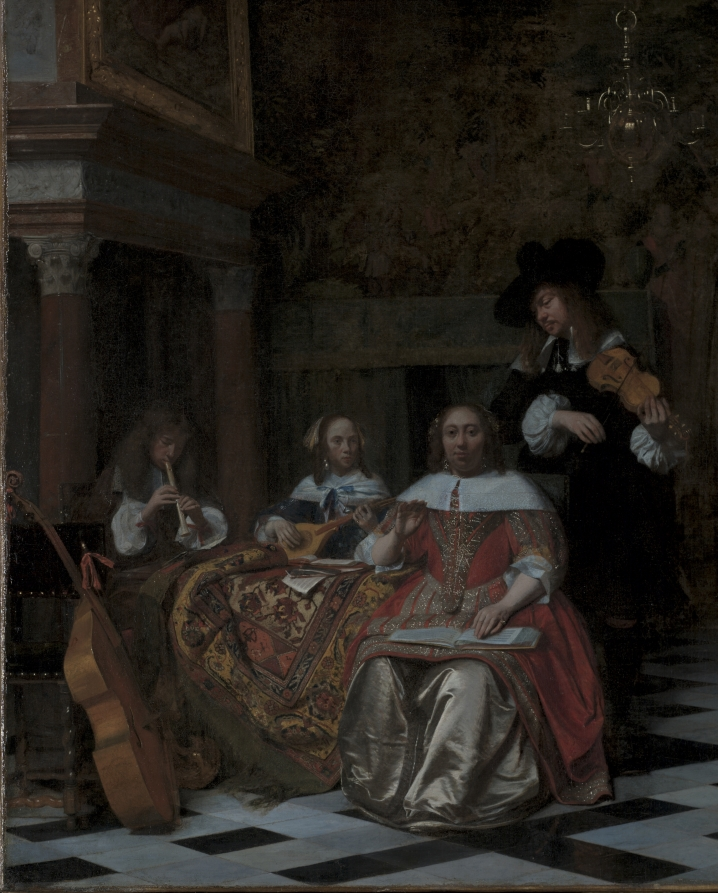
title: Portrait of a Family Playing Music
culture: Netherlands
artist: Pieter de Hooch (Dutch, 1629–1684)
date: 1663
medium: oil on canvas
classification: Painting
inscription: Signed lower left: "P D HOOCH/ 63"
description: The identity of the sitters remains unknown, although the marble floor and mantelpiece, the Transylvanian prayer rug on the table, and the silk clothes all point to the family’s considerable wealth. Furthermore, the richly carved chest at the right supports Chinese vases and Japanese lacquered boxes, a reference to the flourishing Dutch trade with Asia. Music making often took place at home, and its appearance here also signifies the harmoniousness of the family.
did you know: During this period, the Dutch Republic was the richest, most urbanized nation.